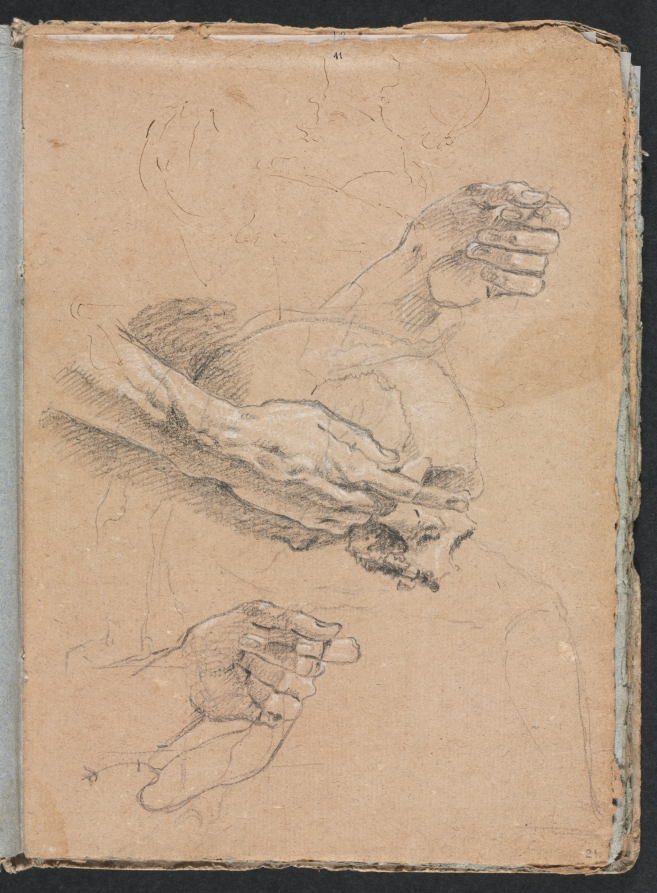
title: Verona Sketchbook:Study of hands and skull (page 21)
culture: Italy, 18th century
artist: Francesco Lorenzi (Italian, 1723–1787)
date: 1760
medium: black chalk with white heightening, underdrawing with brown ink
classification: Bound Volume